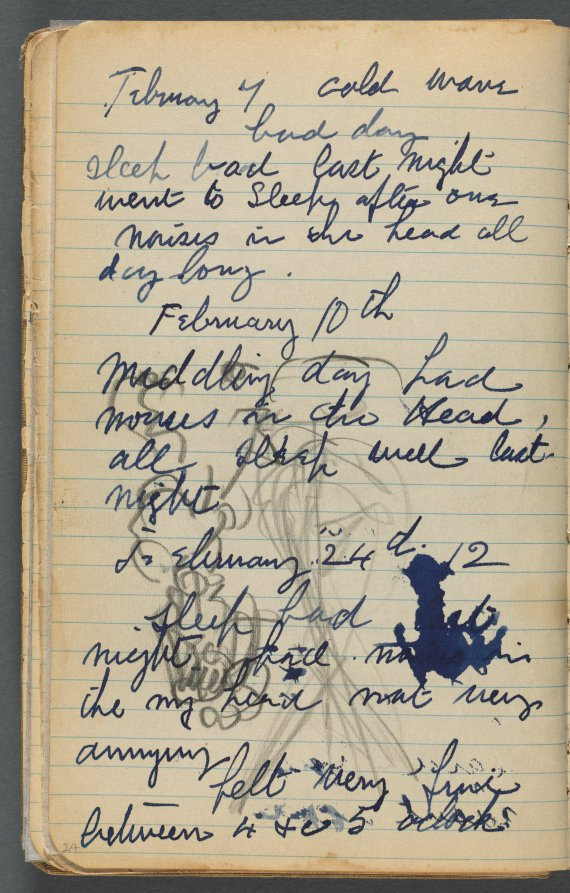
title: Sketchbook, page 024: Notes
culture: America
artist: Maurice Prendergast (American, born Newfoundland [now Canada], 1858–1924)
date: 1905–10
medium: graphite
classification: Bound Volume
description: This sketchbook contains 69 pages of drawings, a diary largely devoted to the state of the artist's health, and a three-page discourse on the nature of genius and ideas.